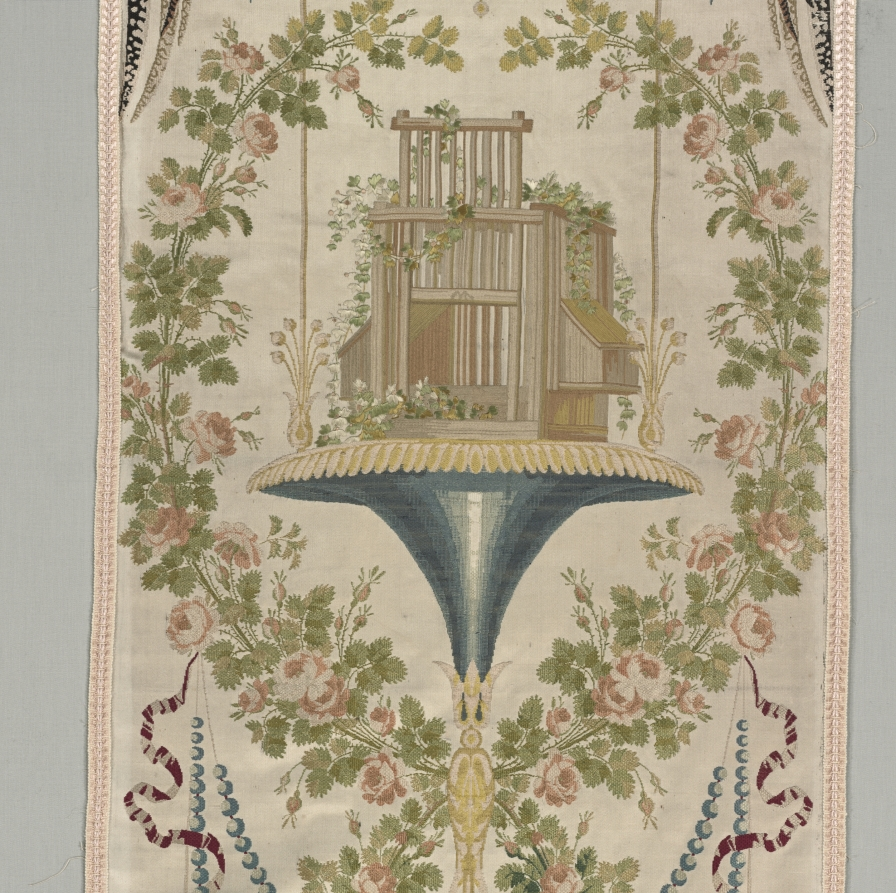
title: Wall Covering, "The Pheasants" from the "Vatican Verdures" Series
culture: France, 18th century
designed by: Jean-Démosthène Dugourc (French, 1749–1825)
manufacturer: Camille Pernon & Cie (French)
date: after 1799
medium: lampas (satin weave and plain weave variant), brocaded, embroidered (chain, satin stitches); silk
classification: Textile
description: France developed a thriving silk industry in Lyon with the goal of becoming the fashion center of Europe. Employment soared to some 20,000 workers by the time of the French Revolution in 1789. Designs changed annually, colors established new fashions, and spectacular silks were produced during the late 1700s. Dugourc, an architect who studied in Italy, became a renowned textile designer for Camille Pernon & Cie, purveyors to King Louis XVI (reigned 1774–92). He created this elaborate, balanced composition as part of elegant wall coverings for the Casita del Labrador, near Madrid. Dugourc named the series after frescos by Raphael in the Vatican.